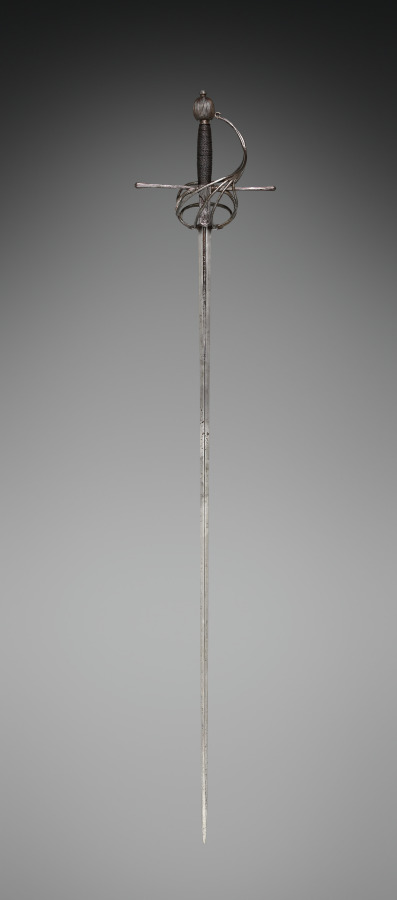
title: Rapier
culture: Blade: Spain, Toledo Hilt: Italt, Belluno?, late 16th-early 17th Century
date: c. 1580–1610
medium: steel, ribbed guard and pommel; wood and wire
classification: Arms and Armor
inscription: PIETRO HERNAN[DJEZ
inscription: three (Toledo and half-moon)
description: The rapier was a sword worn with civilian dress and used in duels. The term rapier derives from the 16th-century French word rapière, which in turn derived from the Spanish espada ropera, or “dress sword.” The rapier was a light weapon with a straight double-edged and pointed blade that, with the development of the art of fencing in the 1500s and 1600s, gradually became narrower and lighter, and thus suitable for thrusts only. With the new technique of swordplay emphasizing the point of the blade, sword guards became more complex to protect the duelist’s unarmored hand. These elaborate guards were frequently decorated by various techniques—chiseling, bluing, russeting, and damascening.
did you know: During this time fencing academies were already in existence in Milan, Venice, Verona, and Madrid, and the rules of fencing evolved with two styles dominating, the Spanish and the Italian.